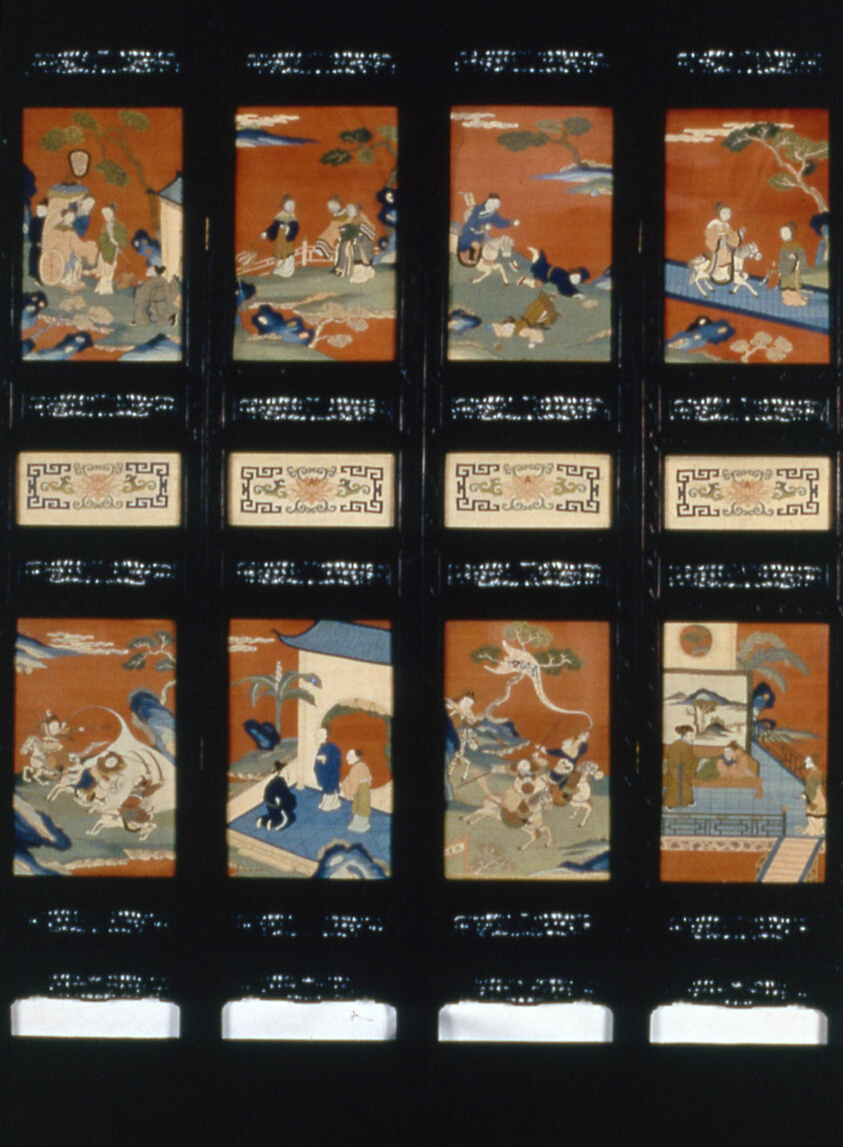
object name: Textile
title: Screen (Four-Fold)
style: qing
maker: China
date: Qing dynasty (1644–1911), 19th century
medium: Wood and glass; top and bottom rows: silk and gold-leaf-over-lacquered-paper-strip-wrapped silk, slit tapestry weave with interlaced outlining wefts; painted details; center row: silk and gold-leaf-over-lacquered-paper-strip-wrapped silk, slit and dovetailed tapestry weave with interlaced outlining wefts; painted details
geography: China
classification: textile; weaving